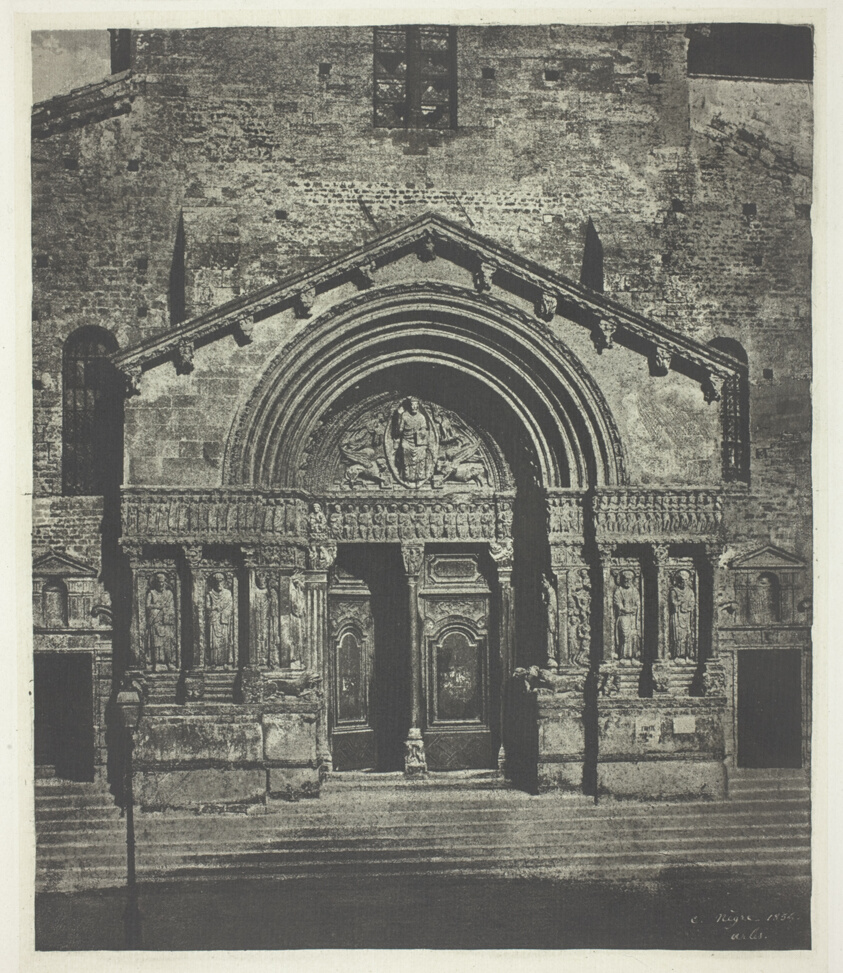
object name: Photograph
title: Arles: The West Porch of Saint-Trophime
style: 19th century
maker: Charles Nègre (French, 1820–1880)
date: October 21, 1854, printed 1982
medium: Photogravure, from the portfolio Charles Negre: Treize Heliogravures, 1854–1857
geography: France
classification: photography; photogravure; photomechanical process; photograph